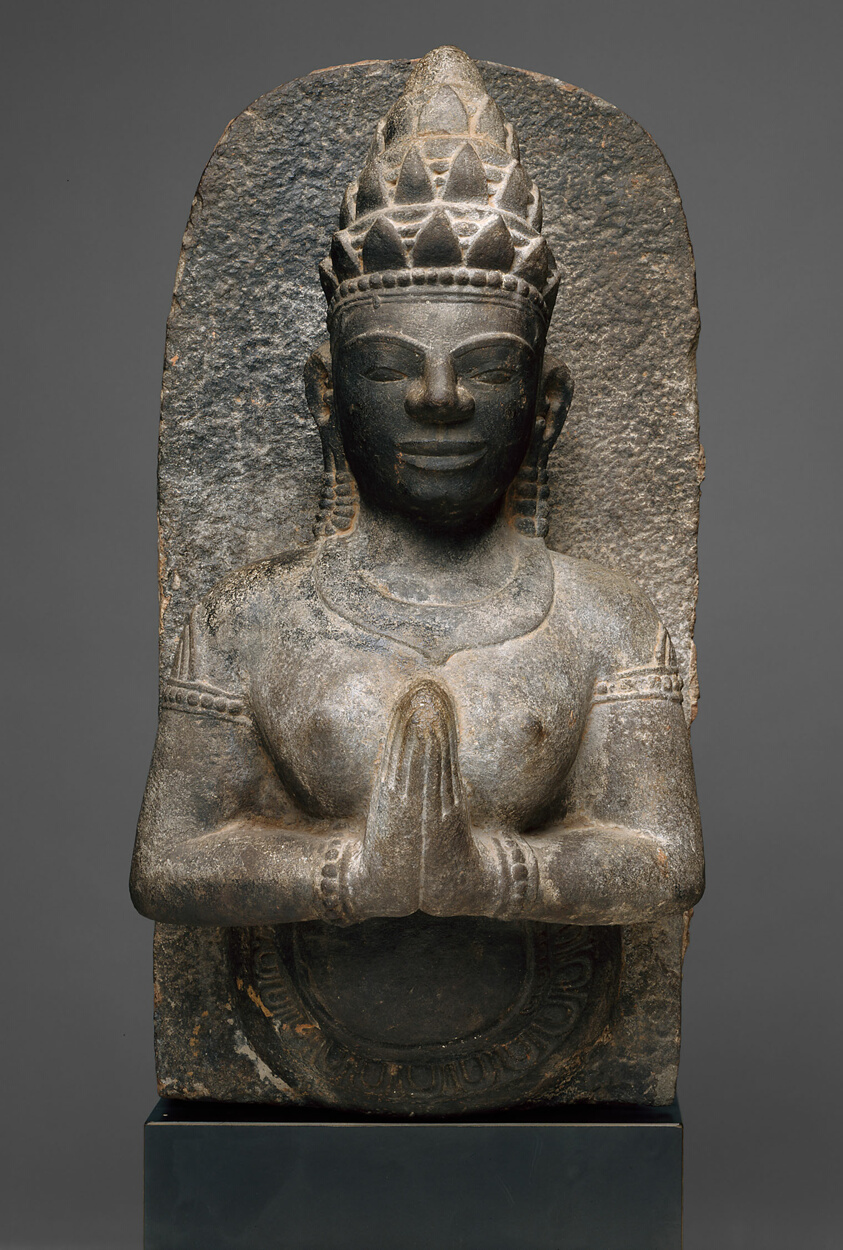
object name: Sculpture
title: Celestial Beauty (Apsara) in Adoration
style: Southeast Asian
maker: Vietnam; Binh Dinh province, Thu Thien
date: Champa period, about 1100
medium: Sandstone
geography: Vietnam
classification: sandstone; stone; sculpture; asian art